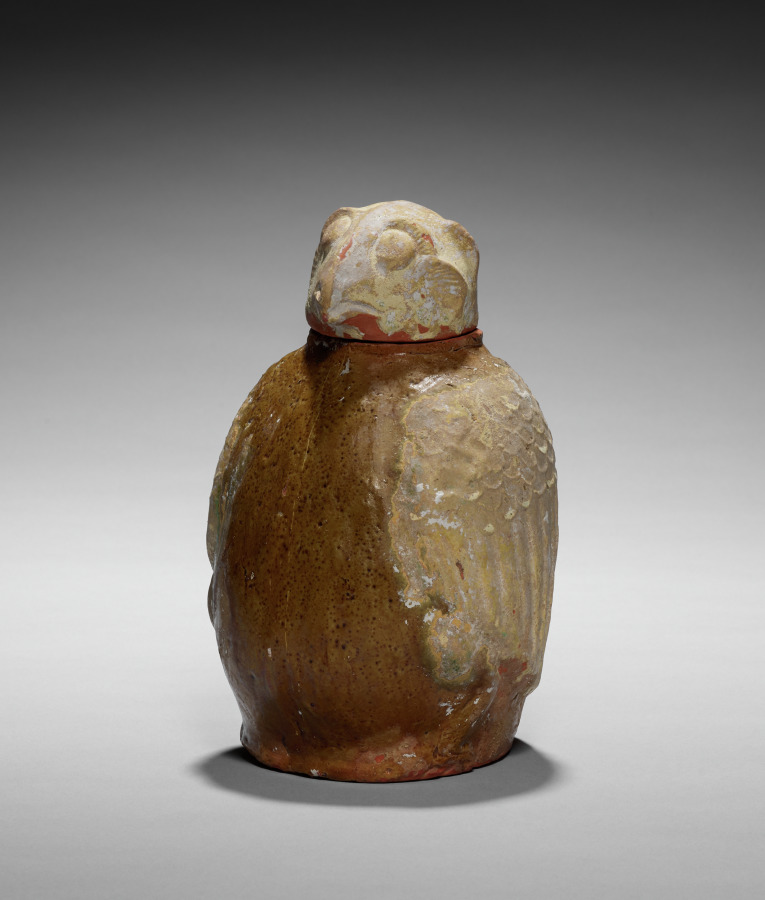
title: Owl-shaped Jar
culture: China, Henan province, Western Han dynasty (206 BCE–8 CE)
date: 206 BCE–9 CE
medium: Amber-brown glazed low-fired pottery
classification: Ceramic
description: Pottery vessels in the shape of owls were made since Neolithic times and throughout the Bronze age. These jars in the form of vigilant owls may have provided a tomb occupant with grain in the afterlife. However, the meaning of these mysterious birds and the association of the owl motif with burial sites in China is not fully understood.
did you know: The jar cover is modeled in the shape of an owl's head.